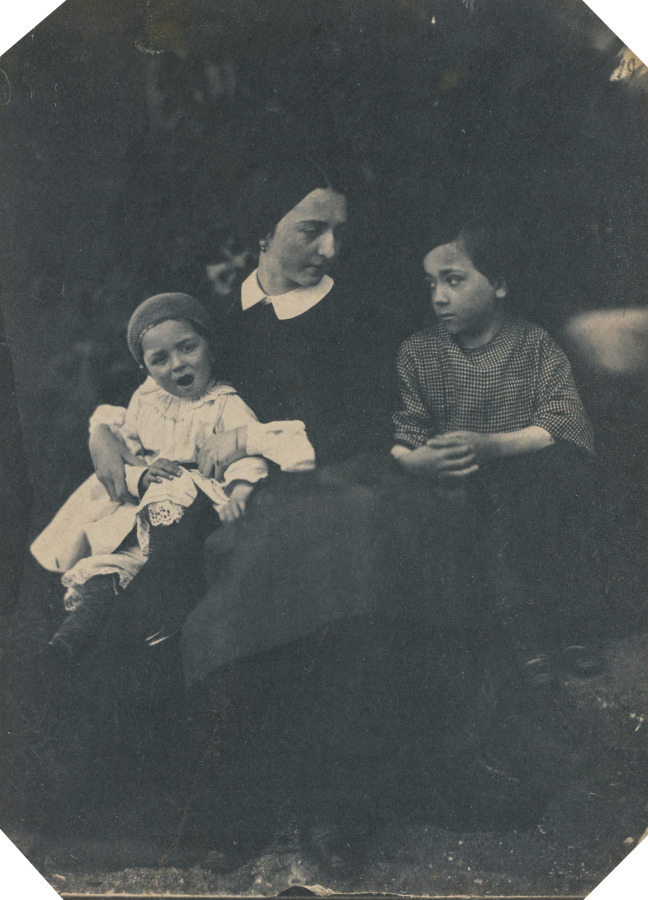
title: Mother with Two Children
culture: France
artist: Jean-Baptist Frénet (French, 1814–1889)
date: c. 1855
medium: salted paper print from a collodion negative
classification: Photograph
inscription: written in black on recto: "19"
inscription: written in pencil on verso: "50/2 [upside down]"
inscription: written in black on verso: "4"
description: After anti-government political activity closed off his professional opportunities as a painter, Jean-Baptiste Frénet took up photography in 1850 and a decade later opened a commercial portrait studio. He preferred simple, plain settings and relied on sitters’ interactions to reveal their personalities and relationships. This family grouping, probably taken for personal pleasure, offers a sense of casual immediacy unusual for the time in both painted and photographic portraiture.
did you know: Frénet was one of the earliest photographers to take spontaneous, rather rigidly formal, portraits.